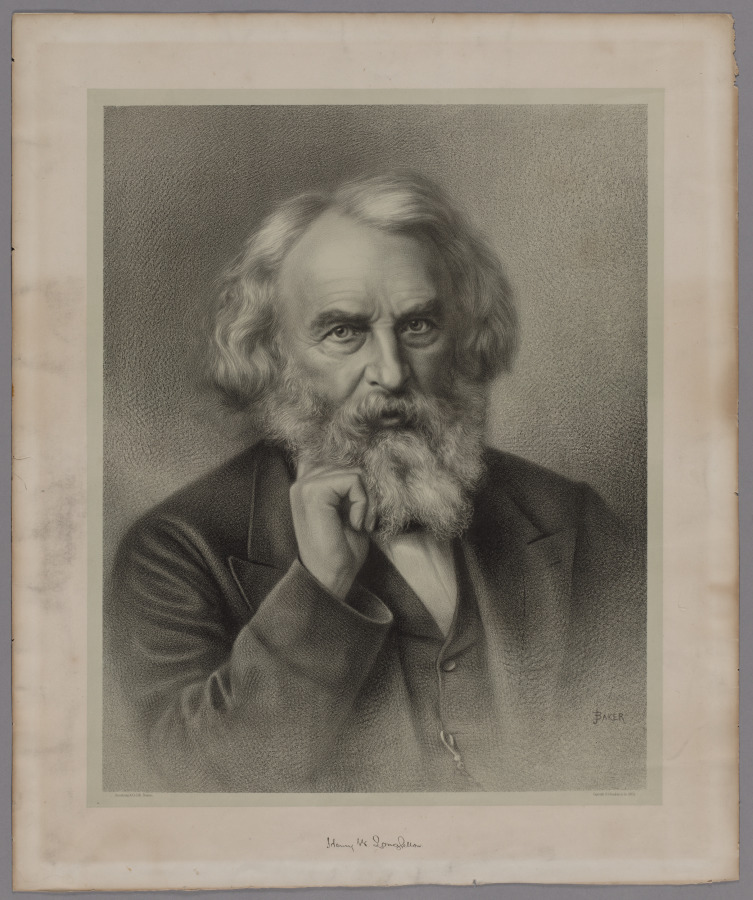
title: Henry Wadsworth Longfellow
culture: America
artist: J. Baker (American)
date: 1875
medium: lithograph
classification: Print